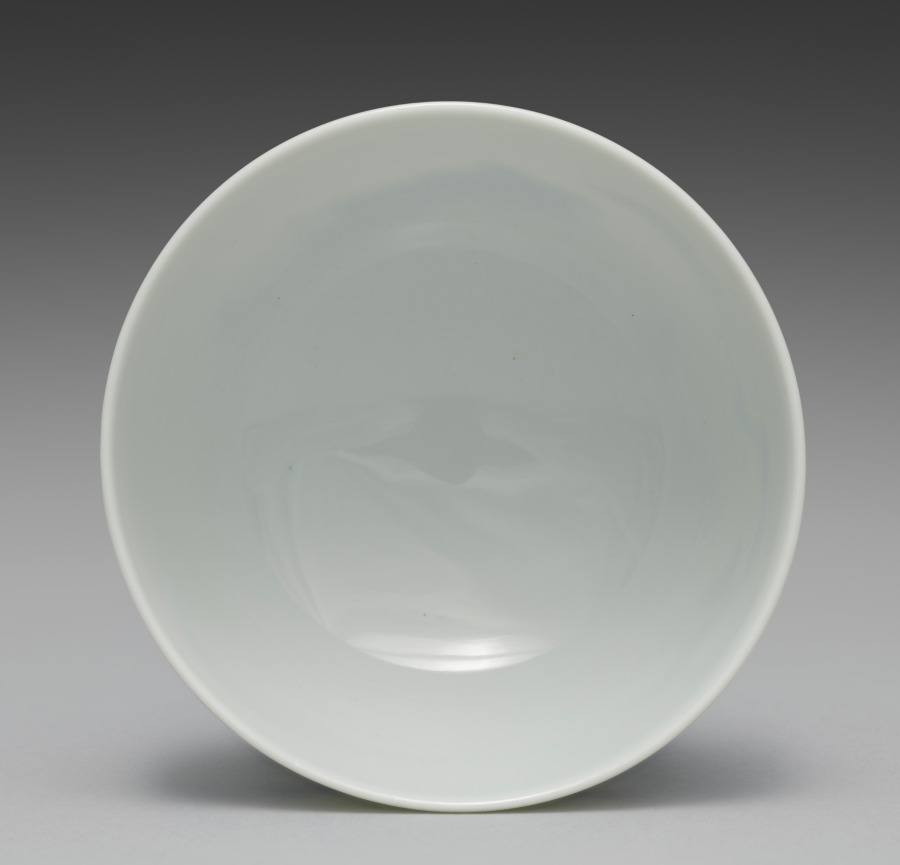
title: Teacup from Tea Set with Chinese Landscape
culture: Japan, Meiji period (1868–1912)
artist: Seifū Yohei III (Japanese, 1851–1914)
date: 1893–1914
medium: Porcelain with underglaze blue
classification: Ceramic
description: The theme of this sencha tea set is the Chinese scholar-recluse in an idyllic landscape. Each of the five teacups has a landscape with an architectural structure and some human activity. This tea set has a side-handled pot called a kyūsu, used for steeping, straining, and serving tea. Unlike some others, this set also has a yuzamashi, a container used to cool boiled water to just the right temperature for the best flavor when steeping. Seifū Yohei III’s painting teacher, Tanomura Chokunyū (1814–1907), made a visual record of famous sencha events that shows how these kinds of porcelains fit with objects such as a stove and kettle to form a complete set of utensils for tea preparation, and with ensembles of decorative objects meant to inspire creativity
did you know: This teacup shows a man with a staff walking away from a residence toward a boat, loaded with what might be a musical instrument wrapped for travel.